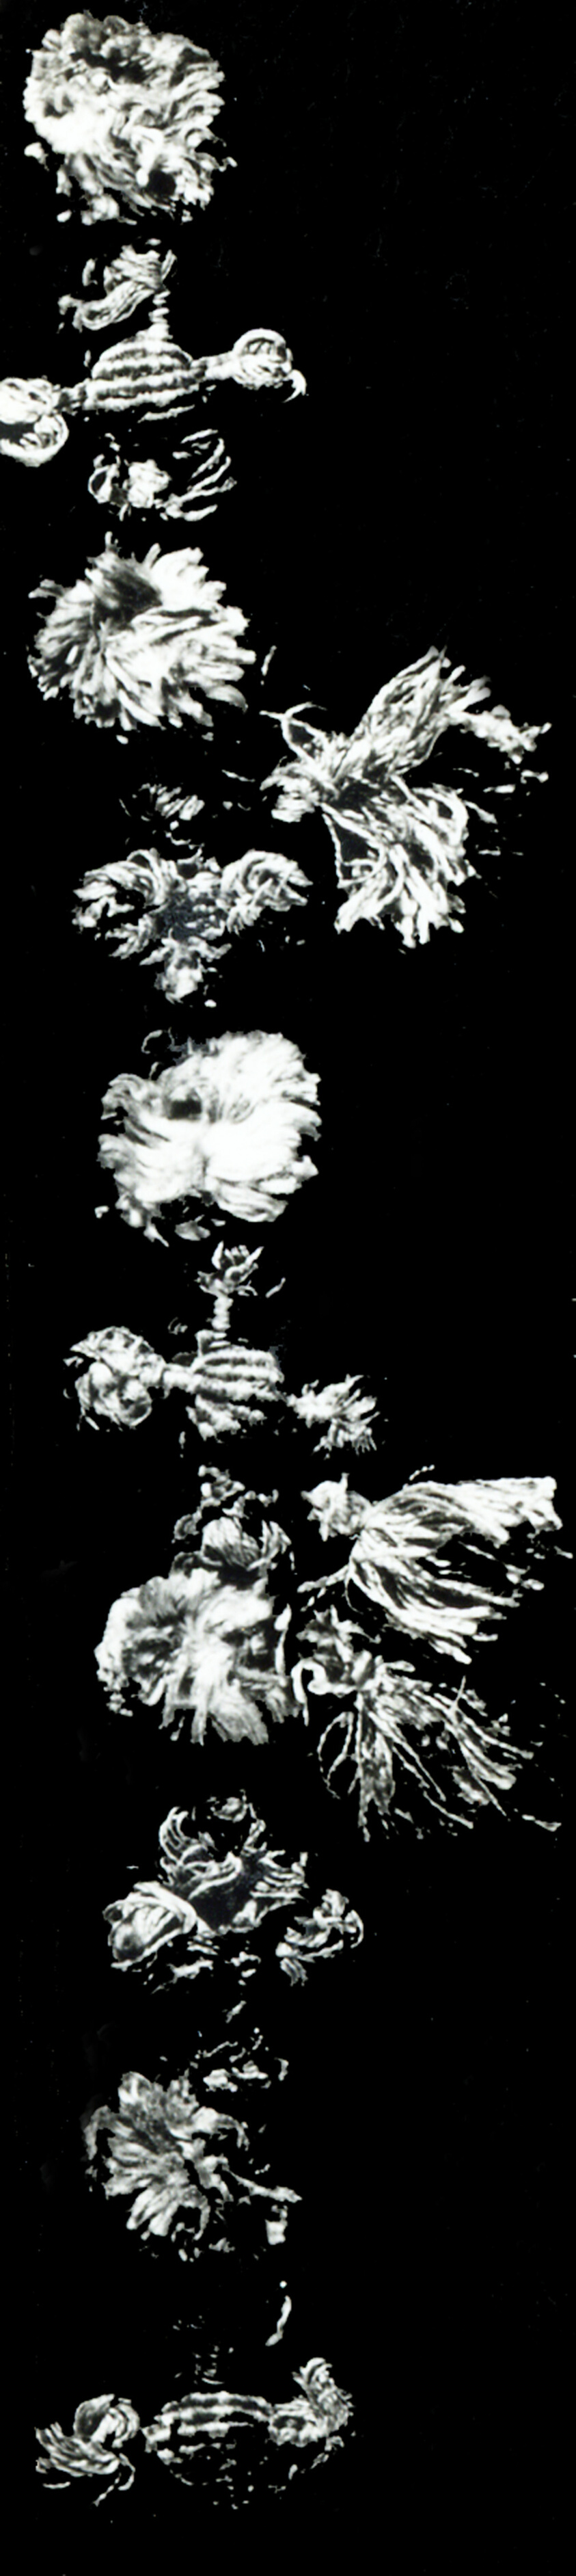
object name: Textile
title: Fringe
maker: Italy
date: 18th century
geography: Italy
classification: textile; weaving